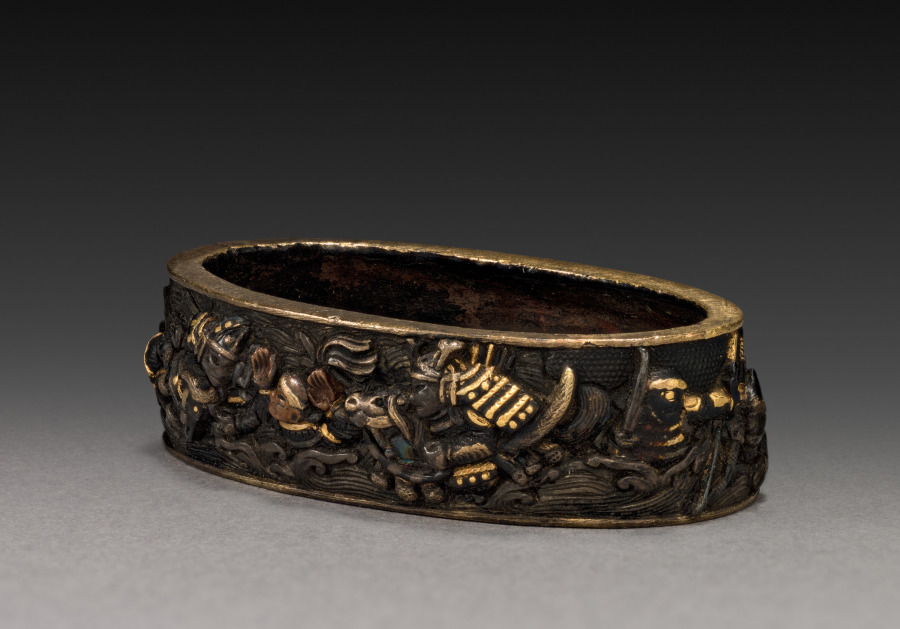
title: Sword-Hilt Collar (Fuchi)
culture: Japan, Edo period (1615–1868)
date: 1700–1850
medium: shakudo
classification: Arms and Armor